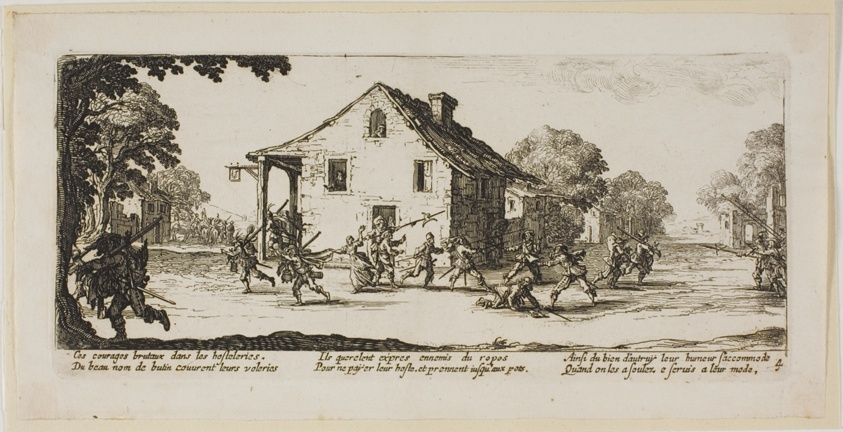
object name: Print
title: Scene of Pillage, plate four from The Large Miseries of War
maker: Gerrit Lucasz van Schagen (Dutch, born 1642); after Jacques Callot (French, 1592-1635)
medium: Etching on paper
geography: Netherlands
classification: etching; print; prints and drawing